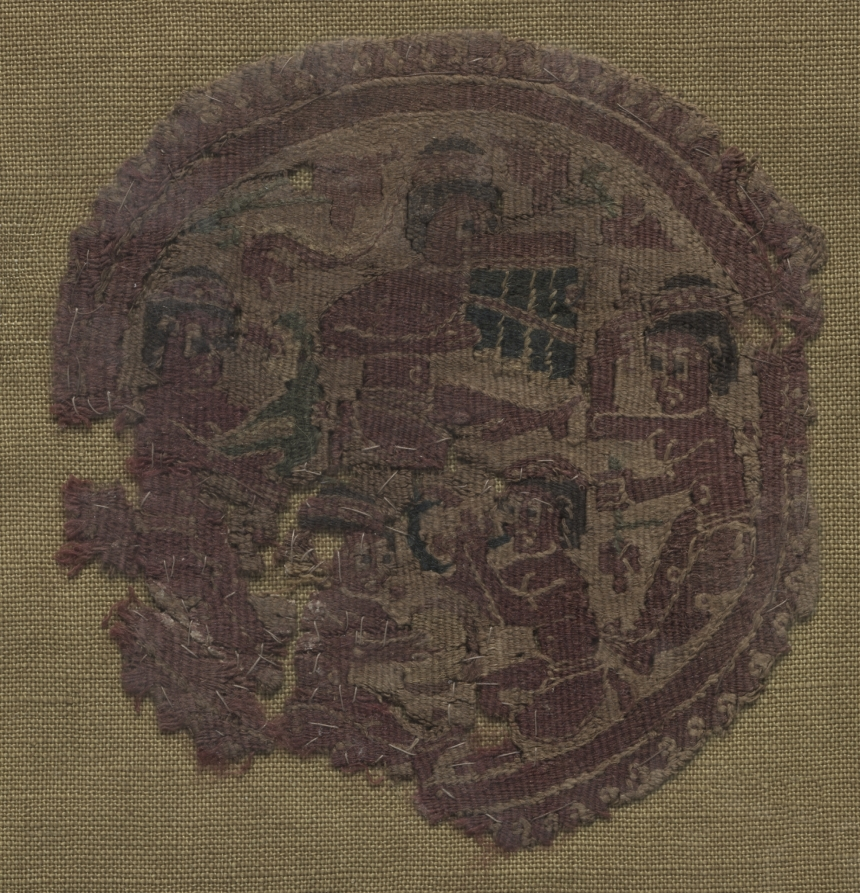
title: Segmentum with Musicians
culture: Egypt, Umayyad period (661–750) or Abbasid period (750–1258)?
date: 650 – 899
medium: tapestry weave; wool and linen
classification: Textile